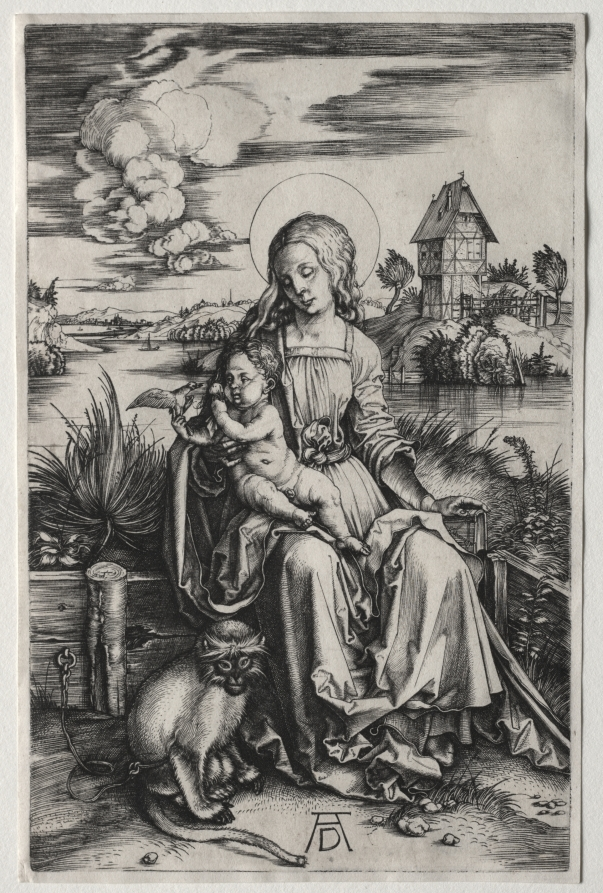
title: The Virgin and Child with a Monkey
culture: Germany, late 15th Century-early 16th Century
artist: Albrecht Dürer (German, 1471–1528)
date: c. 1498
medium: engraving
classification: Print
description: Catholic theology during the Renaissance taught the Virgin Mary as a woman born without original sin, an idea manifested in botanical and zoological symbols. Albrecht Dürer portrayed the Virgin and Christ child within a garden enclosed by a low wood gate. Mary gazes down at her son, who holds a bird with his left hand, a symbol of the souls he will save through his Crucifixion. The tamed monkey, chained to the fence, is an accurate zoological study (probably a Barbary macaque) with a theological role: associated with bodily pleasure, it shows the power of Mary’s virtue over Eve’s sin.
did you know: The monkey portrayed here can be identified as a Barbary macaque, which the artist may have seen as part of a zoological collection in Germany.